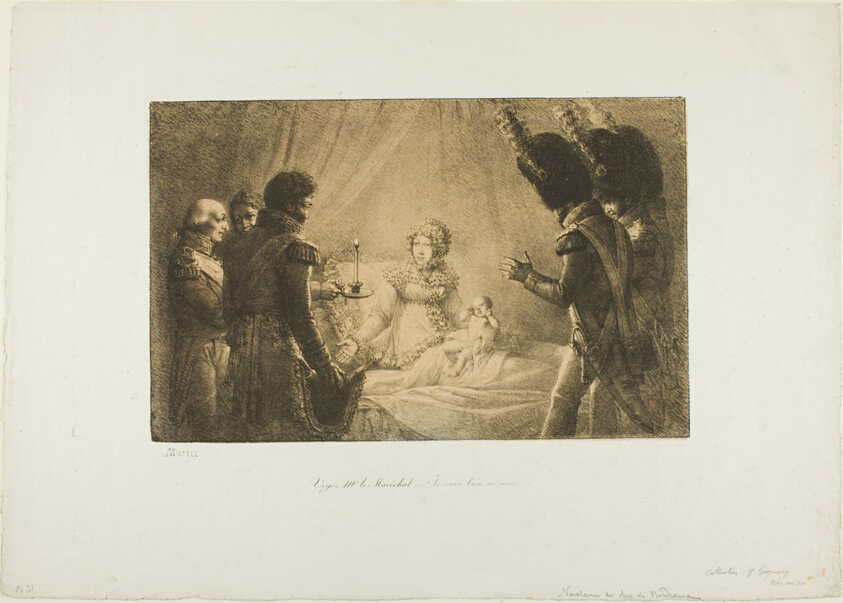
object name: Print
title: See, M. le Maréchal, I am Truly His Mother...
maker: Jean Henri Marlet (French, 1771-1847)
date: 1820–22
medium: Lithograph in black over fawn lithographic tint on ivory wove paper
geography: France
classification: lithograph; print; prints and drawing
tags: mothers, babies